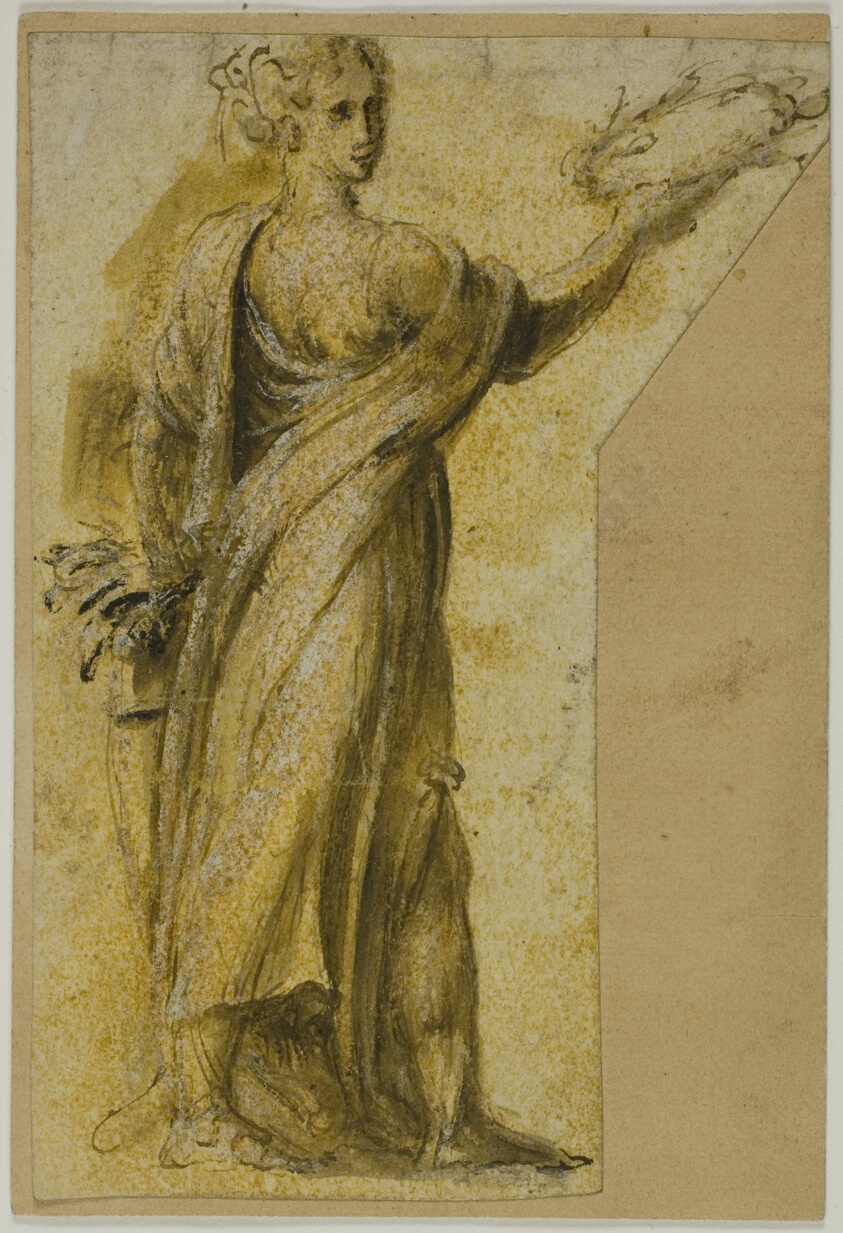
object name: Drawing and Watercolor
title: Standing Woman with Laurel Wreath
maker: Biagio Pupini, called dalle Lame; Italian, active 1511-1551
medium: Pen and brown ink with brush and brown and orange wash, heightened with lead white, over brown chalk, on ivory laid paper, laid down on tan laid paper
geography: Italy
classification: pen and ink drawings; drawings (visual works); prints and drawing